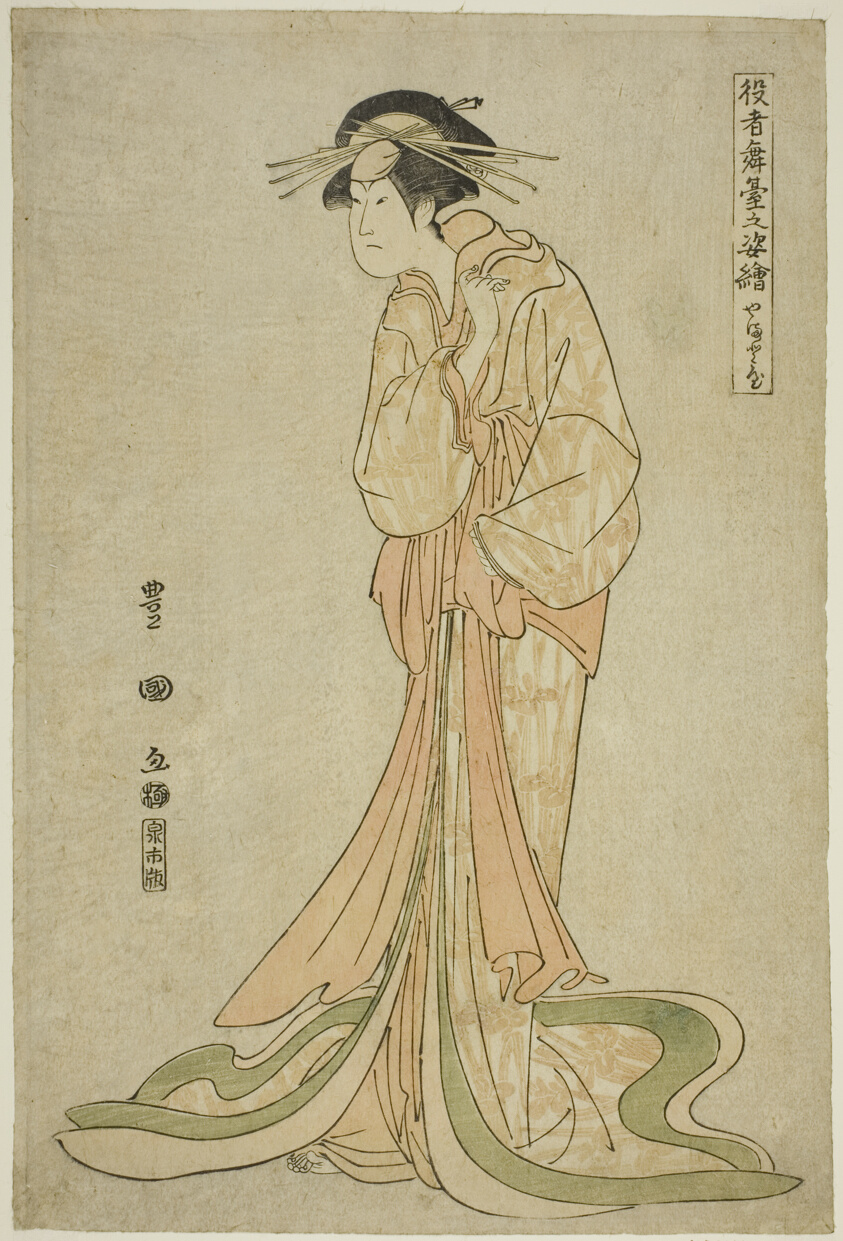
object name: Print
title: Yamatoya: Iwai Hanshiro IV as Okaru, from the series "Portraits of Actors on Stage (Yakusha butai no sugata-e)"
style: Japanese (culture or style)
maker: Utagawa Toyokuni I 初代 歌川 豊国; Japanese, 1769–1825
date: 1795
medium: Color woodblock print; oban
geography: Japan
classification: woodblock print; print; asian art